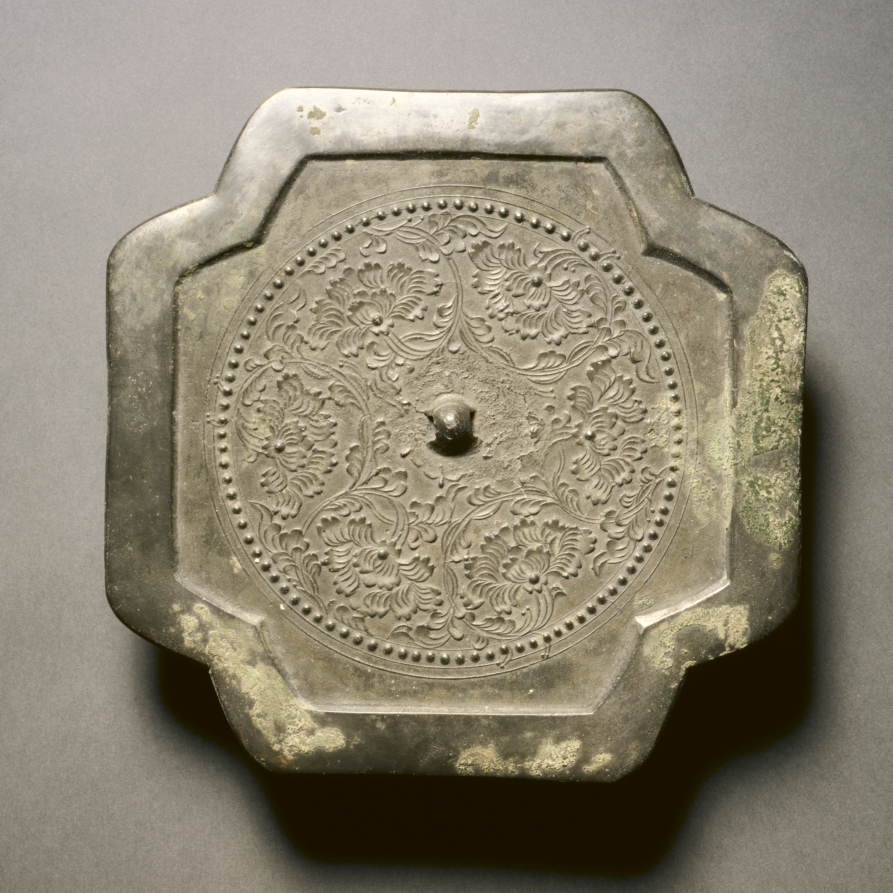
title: Cruciform Mirror with Six Blossoms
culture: China, Northern Song dynasty (960-1127)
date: 960–1127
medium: bronze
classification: Metalwork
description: This cross-shaped mirror has a simple wide frame and a small knob. A part of the floral pattern surrounding the knob has been compromised, likely due to poor casting or damage. The mirror is decorated with designs of flower branches and leaves, which encapsulate six flowers. A few of these branches protrude beyond the beaded circular border to touch the edge of the outer circle, adding a playful dynamism. Similar motifs can be found on silver objects and porcelain of this period.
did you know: Bronze mirrors were made in China from neolithic times until the Qing dynasty, when glass mirrors were brought to China from the West.